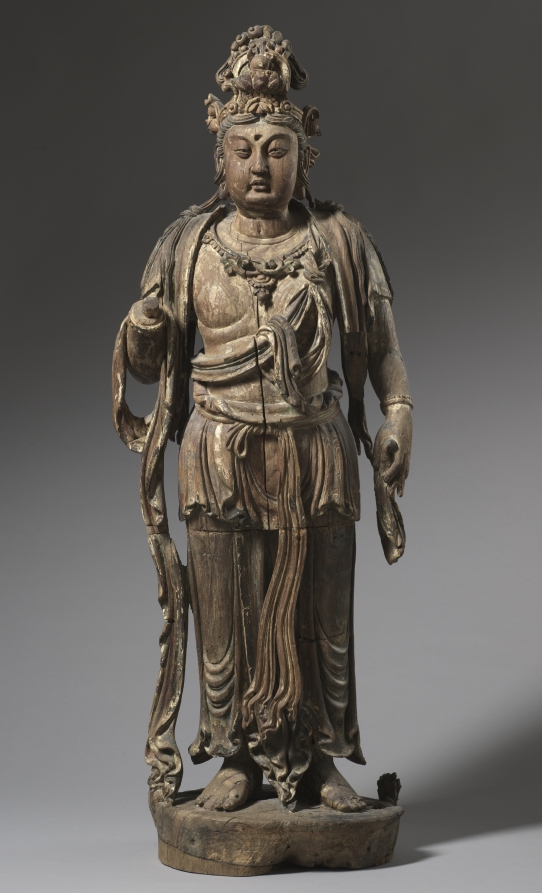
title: Standing Bodhisattva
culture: China, Jin dynasty (1115-1234)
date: 1200s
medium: wood with traces of polychromy and gold leaf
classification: Sculpture